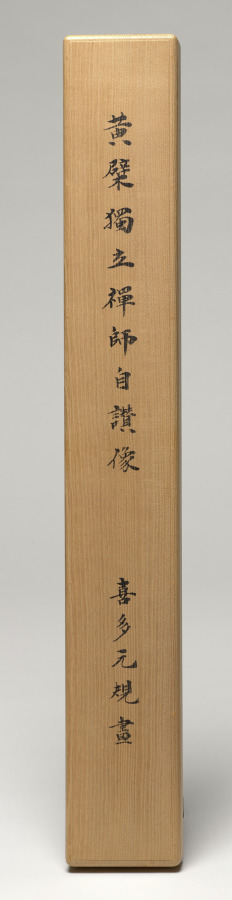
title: Portrait of Duli Xingyi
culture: Japan, Edo period (1615–1868)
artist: Kita Genki (Japanese, active c. 1664–98)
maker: Duli Xingyi (Chinese, 1596–1672)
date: 1671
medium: hanging scroll; ink and color on paper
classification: Painting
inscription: 1671 inscription at top of scroll by Duli Xingyi with three seals, 東矣䪩 (prefatory), 遺世獨立 (top) , 天外一閒人 (bottom); seal of Genki at lower left of painting 元規 .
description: In this portrait, the Ōbaku school Buddhist monk Duli Xingyi (born Tai Li, 1596–1672), whose name is pronounced Dokuryū Shōeki in Japanese, sits upon a woven mat holding a ceremonial scepter known as a ruyi, or nyoi in Japanese. Above his head is an insciption he added to the painting in 1671, the year before his death. It may be translated to read: Contemplative emptiness: the moon suspended over the village at midnight. Suddenly my soul is startled by the howl of an ape. Who could know that it would arouse me beyond my senses, and bring me an inner vision from Mt. Sumeru. (translated by Stephen Addiss and Kwan S. Wong) Originally from what is now the city of Hangzhou in China, Duli emigrated to Japan in 1653, where he took monastic vows. His skills in calligraphy and seal carving were formidable. Painter Kita Genki combined Chinese brush styles he learned in Nagasaki with Western painting techniques to capture Duli's likeness.